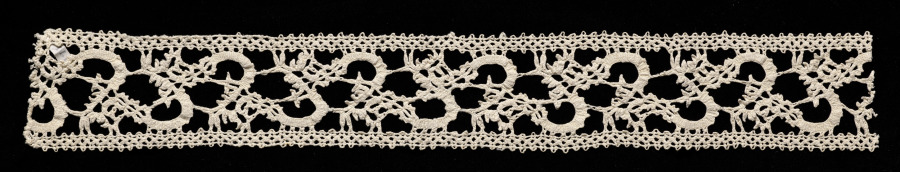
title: Lace Insertion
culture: Italy, Venice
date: 1600–1640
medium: Bobbin lace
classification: Lace